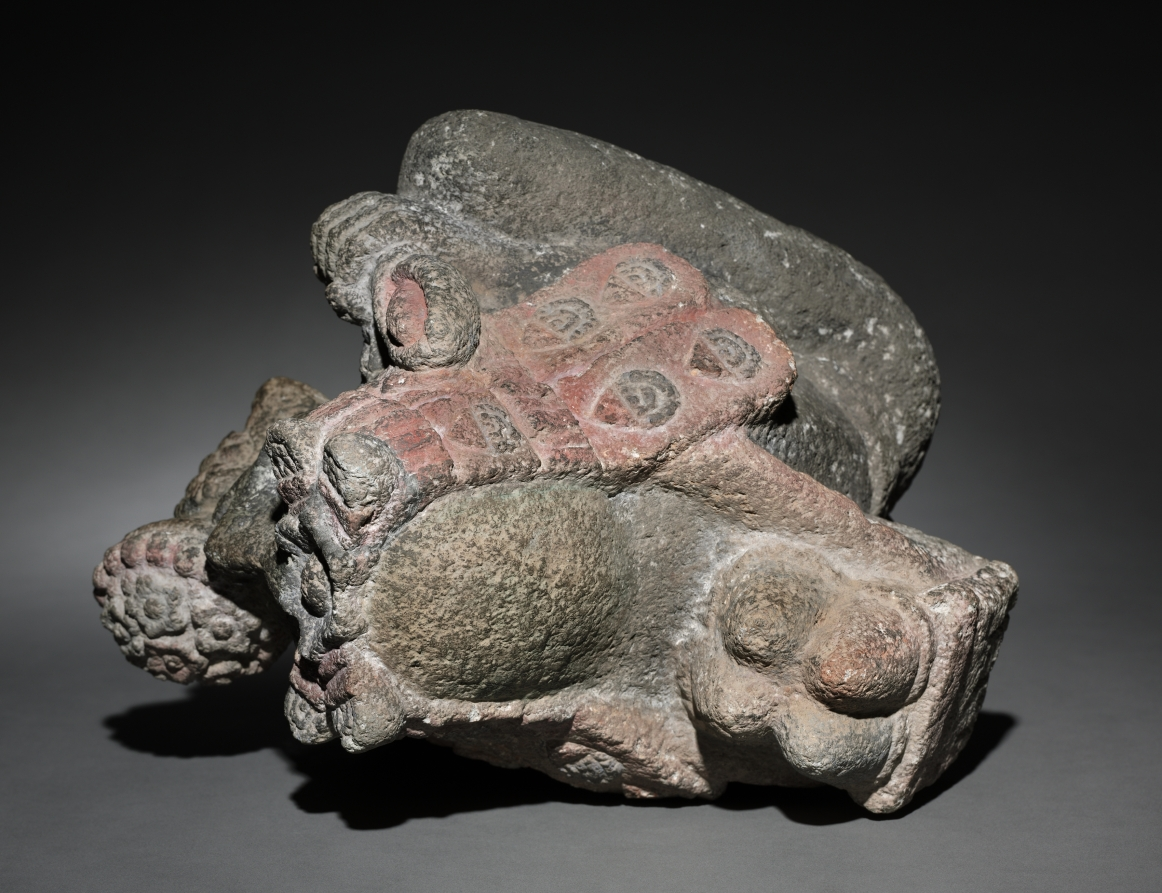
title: Seated Male Carrying Maize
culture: Central Mexico, Aztec style, 13th-16th century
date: 1325–1521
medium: stone, pigment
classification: Sculpture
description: This figure probably represents an Aztec deity-either Macuilxochitl or Xochipilli-whose domain was beauty, the arts, and such pleasures as gameplaying, dancing, and sex. Both names include the Aztec word for "flower," and in one hand the figure holds a cone of flowers, perhaps the blossoming crown of a cactus. For the Aztecs, flowers signified beauty, refinement, and fertility in general and sexuality in particular. The burden of maize cobs on his back also may allude to his creative energies.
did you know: Macuilxochitl is one of five gods of excess pleasure, and the punishment that follows.